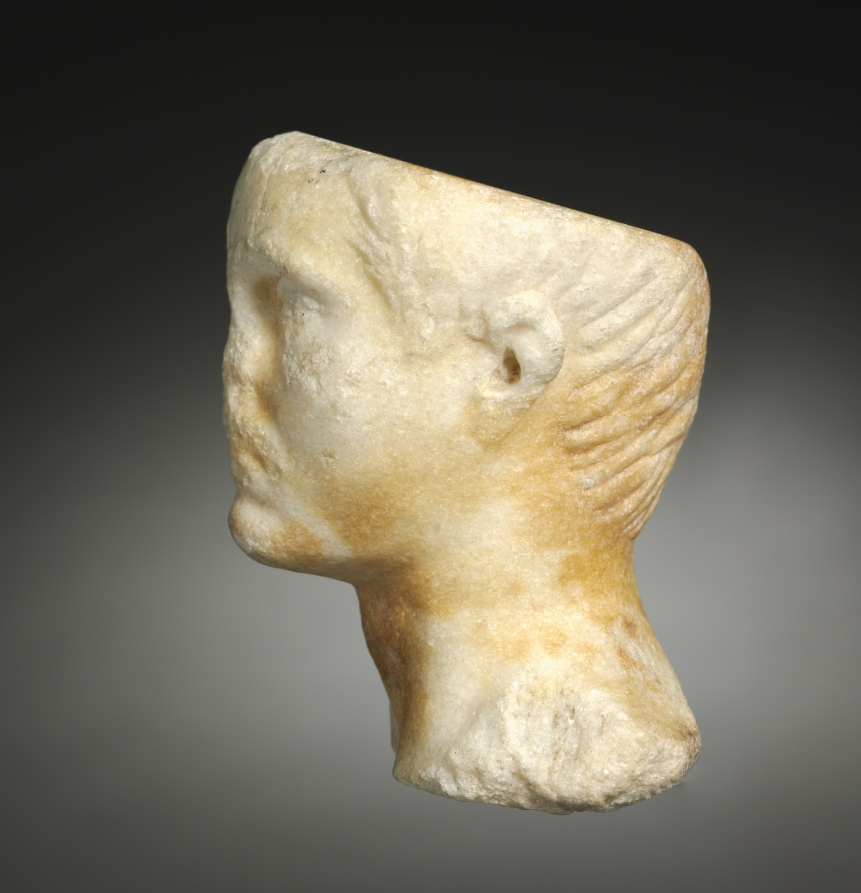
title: Fragment: Head of a Man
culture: Greco-Roman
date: 100 BCE–100 CE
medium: marble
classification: Sculpture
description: This small marble portrait of a man is heavily damaged, with weathering on the face, a break at the neck, and a large portion of the top of the head missing. It depicts a beardless youth with close-cropped hair. The flat top and back of the head may indicate that it was part of a larger composition.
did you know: Some marbles are softer than others and more vulnerable to wear.